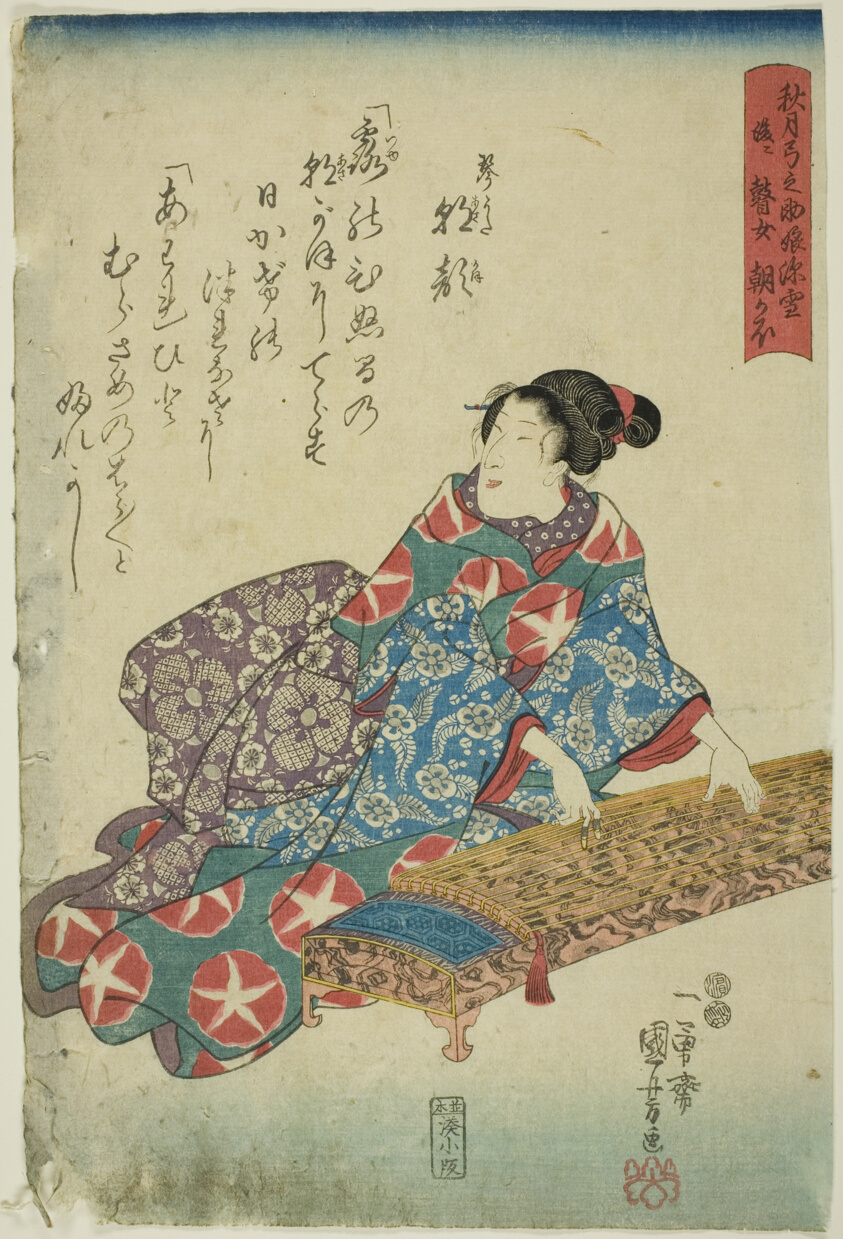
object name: Print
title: Akizuki Yuminosuke's Daughter Miyuki, Later the blind Musician Asagao (Akizuki Yuminosuke musume Miyuki, nochi ni goze Asagao)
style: Japanese (culture or style)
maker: Utagawa Kuniyoshi (Japanese, 1797-1861)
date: c. 1848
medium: Color woodblock print; oban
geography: Japan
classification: woodblock print; print; asian art